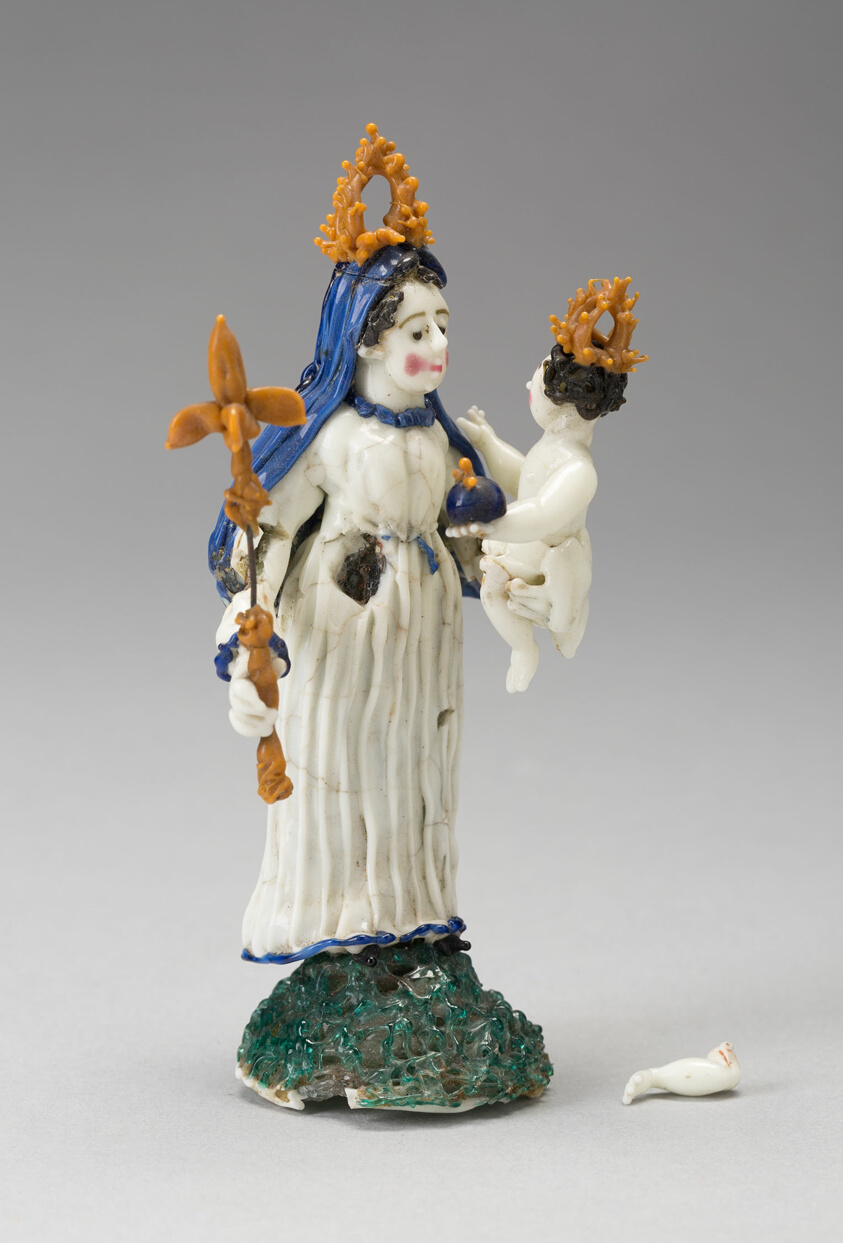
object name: Glass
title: Madonna and Child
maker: Nevers, France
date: Early 18th century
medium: Glass; lampwork (verre de Nevers), metal armature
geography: France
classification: glass; miniature; decorative object/ornament; european decorative arts